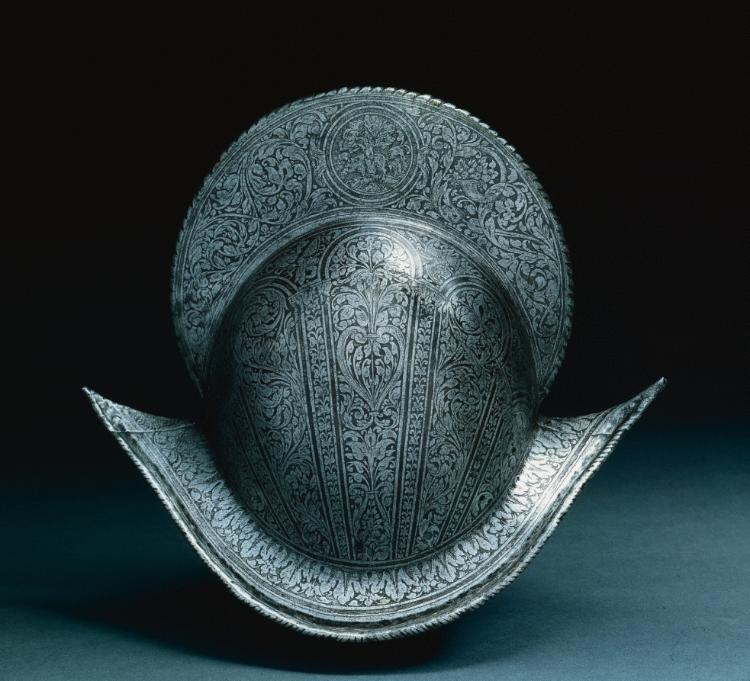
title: Morion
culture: North Italy, late 16th Century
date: c. 1575–1600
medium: steel with etched floral motif and medallion (on comb) with boar under oak tree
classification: Arms and Armor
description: The morion, an open helmet characterized by a tall comb and curved brim peaking before and after, was popularly associated with the Spanish conquistadors in the New World. In fact, morions were worn by infantry and light horsemen throughout Europe. They were also commonly worn by palace guards and thus often were decorated. This example has been beautifully etched over its entire surface. Armor this exquisitely decorated would not have been worn in battle, but used by palace guards for ceremonies and display.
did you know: Amongst the swirling floral patterns on this helmet, there is scene of a boar under a tree in the center medallion of the comb that tops the helmet.